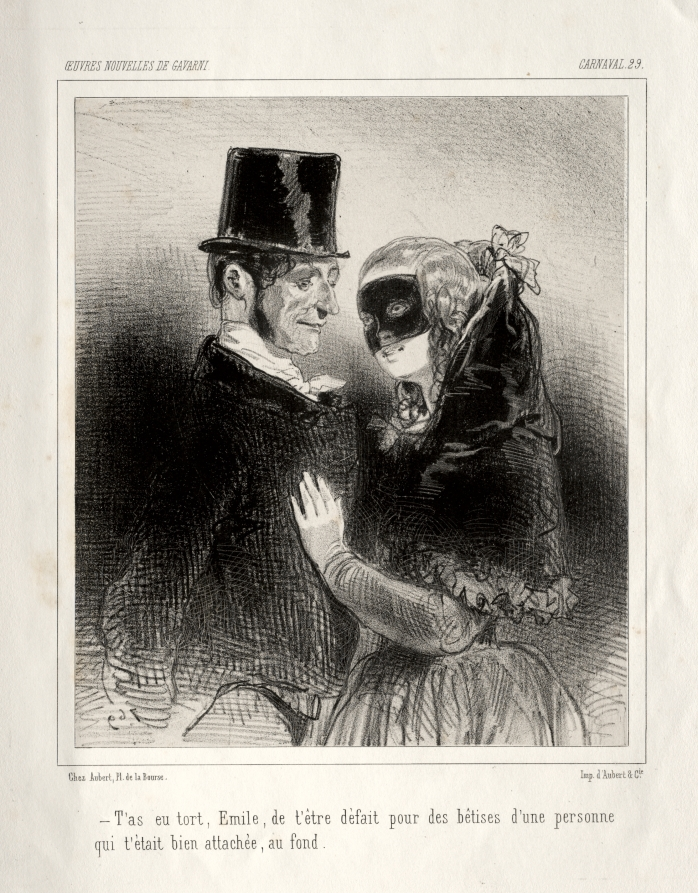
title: Carnaval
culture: France, 19th century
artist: Paul Gavarni (French, 1804–1866)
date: c. 1841–47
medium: lithograph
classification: Print